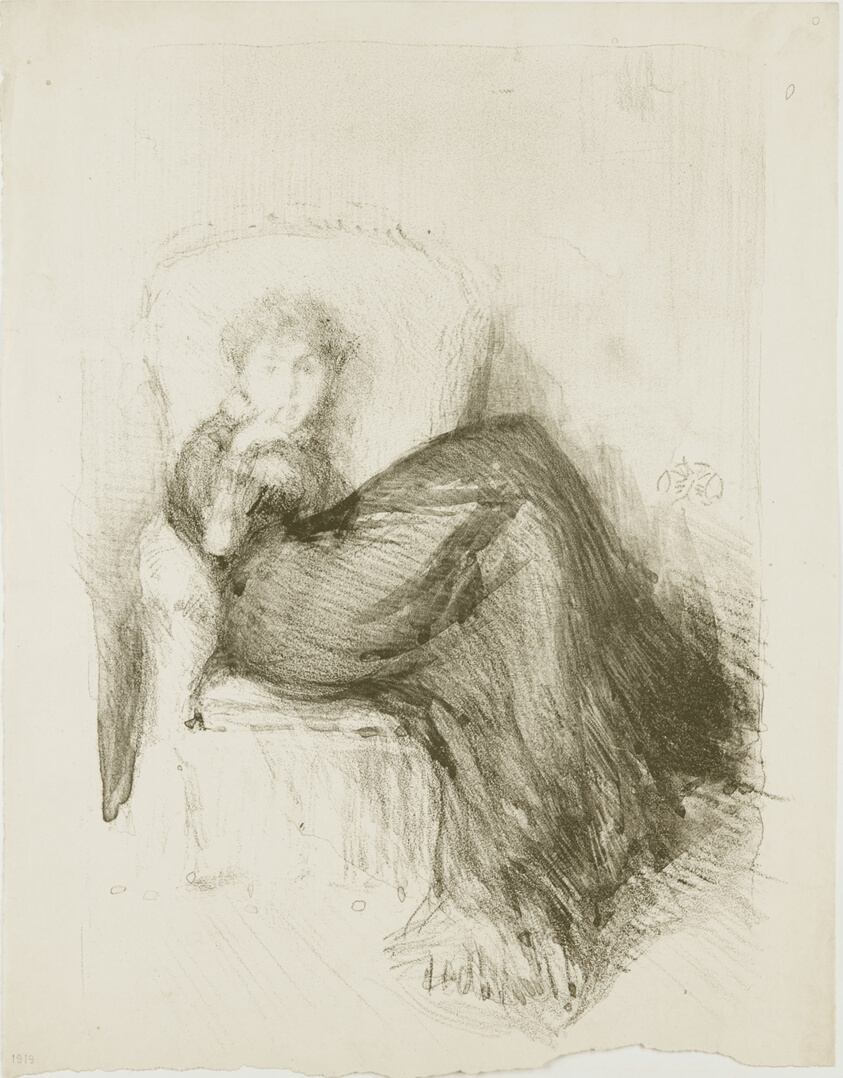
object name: Print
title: Study: Maud Seated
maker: James McNeill Whistler (American, 1834-1903)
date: 1878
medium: Lithotint in black, with scraping and roulette, on ivory wove proofing paper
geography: United States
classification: lithotint; lithograph; print; prints and drawing; paper